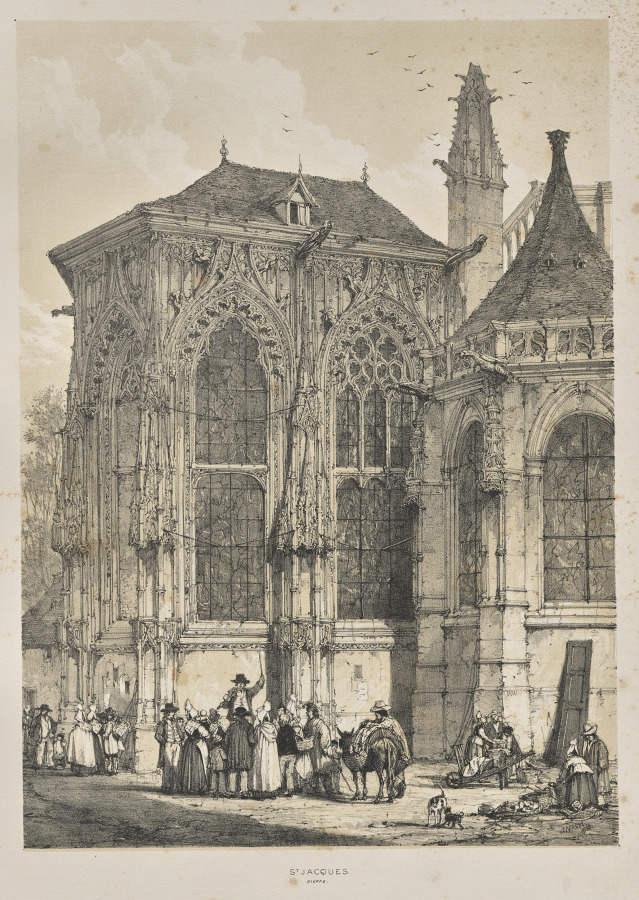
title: Architecture of the Middle Ages: St. Jacques, Dieppe, East End, Exterior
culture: England, 19th century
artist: Joseph Nash (British, 1808–1878)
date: 1838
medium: lithograph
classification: Print